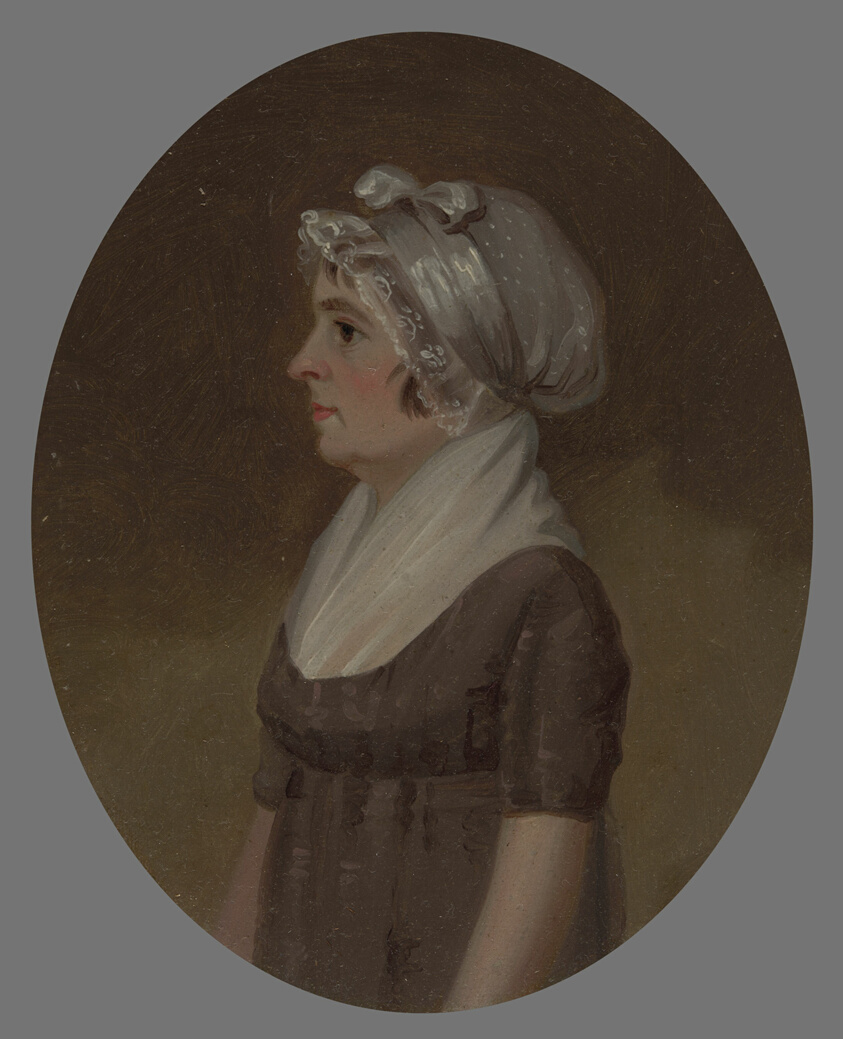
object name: Painting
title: Mrs. Benjamin Schaum (Anna Maria Heckensweiler)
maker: Jacob Eichholtz (American, 1776–1842)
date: 1808–10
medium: Oil on yellow poplar panel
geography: Lancaster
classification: painting; american arts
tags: fashion, people, portraits